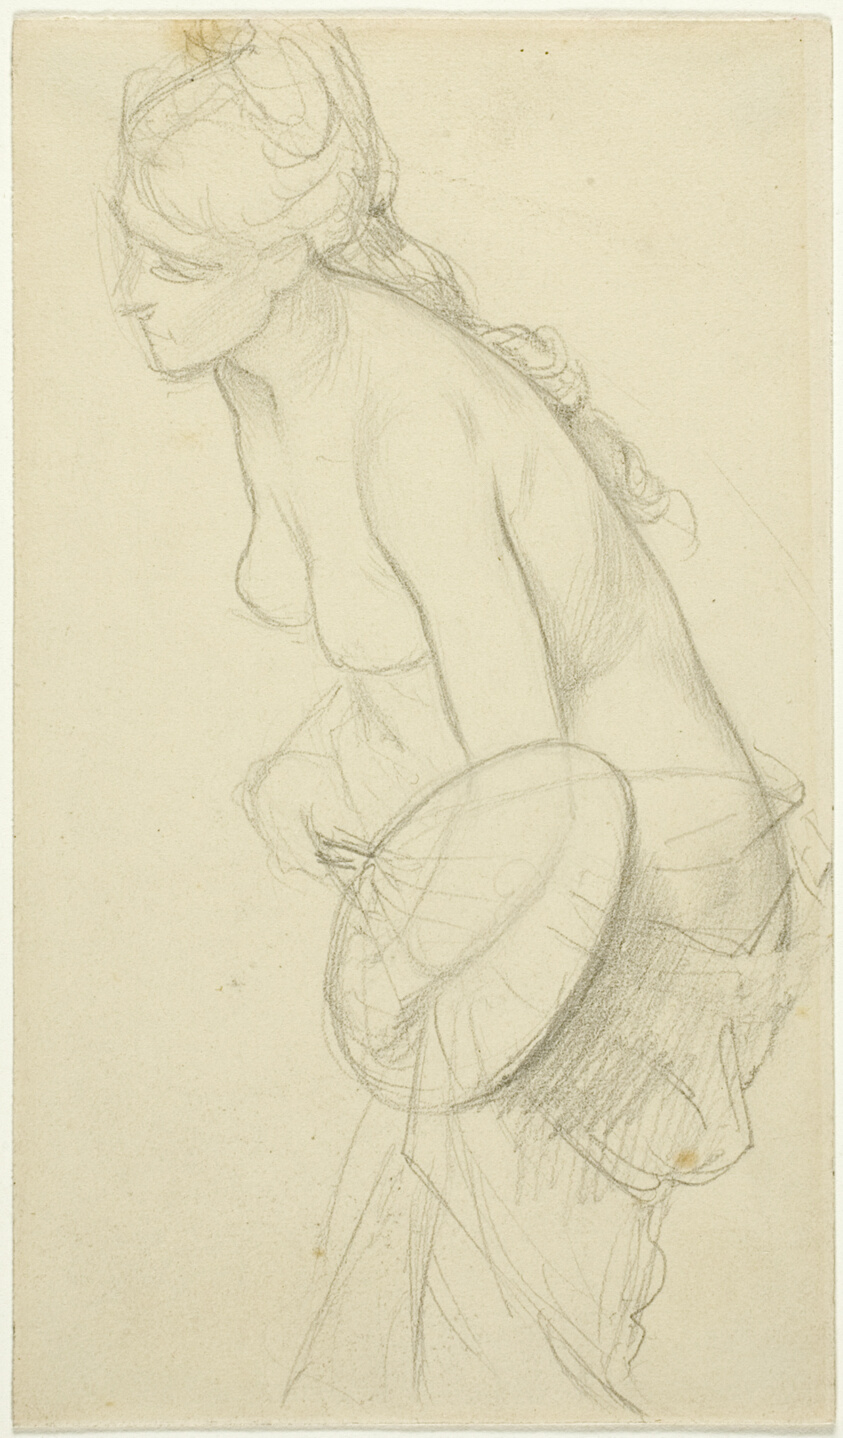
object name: Drawing and Watercolor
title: Nude Figure Holding a Fan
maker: Charles French (Unknown, 1835-1883)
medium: Graphite on cream wove paper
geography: Unknown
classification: graphite; drawings (visual works); prints and drawing